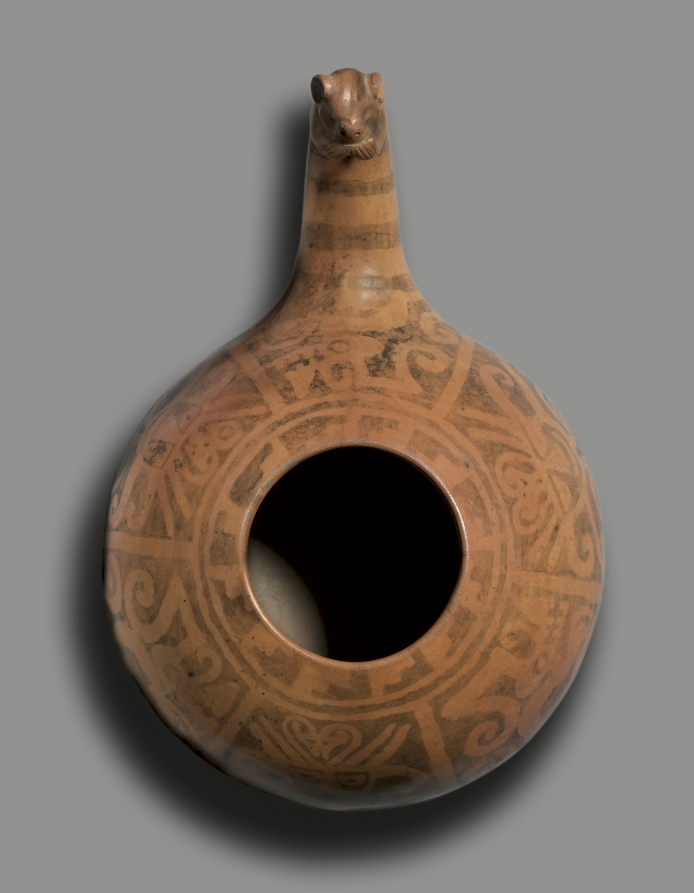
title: Dipper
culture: Peru, North Highlands, Recuay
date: 100 BCE–700 CE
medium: ceramic, slip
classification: Ceramic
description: Both of these objects feature a creature known as the "Recuay feline," although it could also refer to a fox, dog, or viscacha (a rodent). Whatever its identity, the prominent crest on its head ties it to the supernatural realm, a connection underlined by the deity head that also appears on the dipper and by the ritual function of snuff tablets, which were used to inhale hallucinogenic snuffs during religious ceremonies.